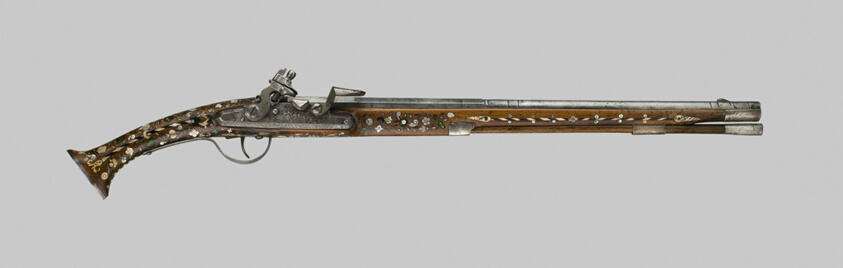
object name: Arms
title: Flintlock Pistol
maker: French, Alsace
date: 1640/50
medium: Steel, silver, brass, wood, mother-of-pearl, and horn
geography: Alsace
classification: firearm-handgun; arms; arms and armor